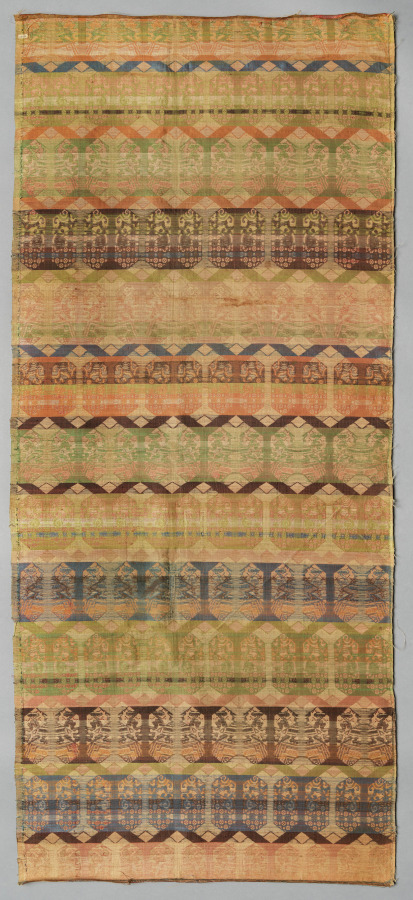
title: Square Textile Cover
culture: Japan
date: 1800s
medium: Brocaded silk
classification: Textile